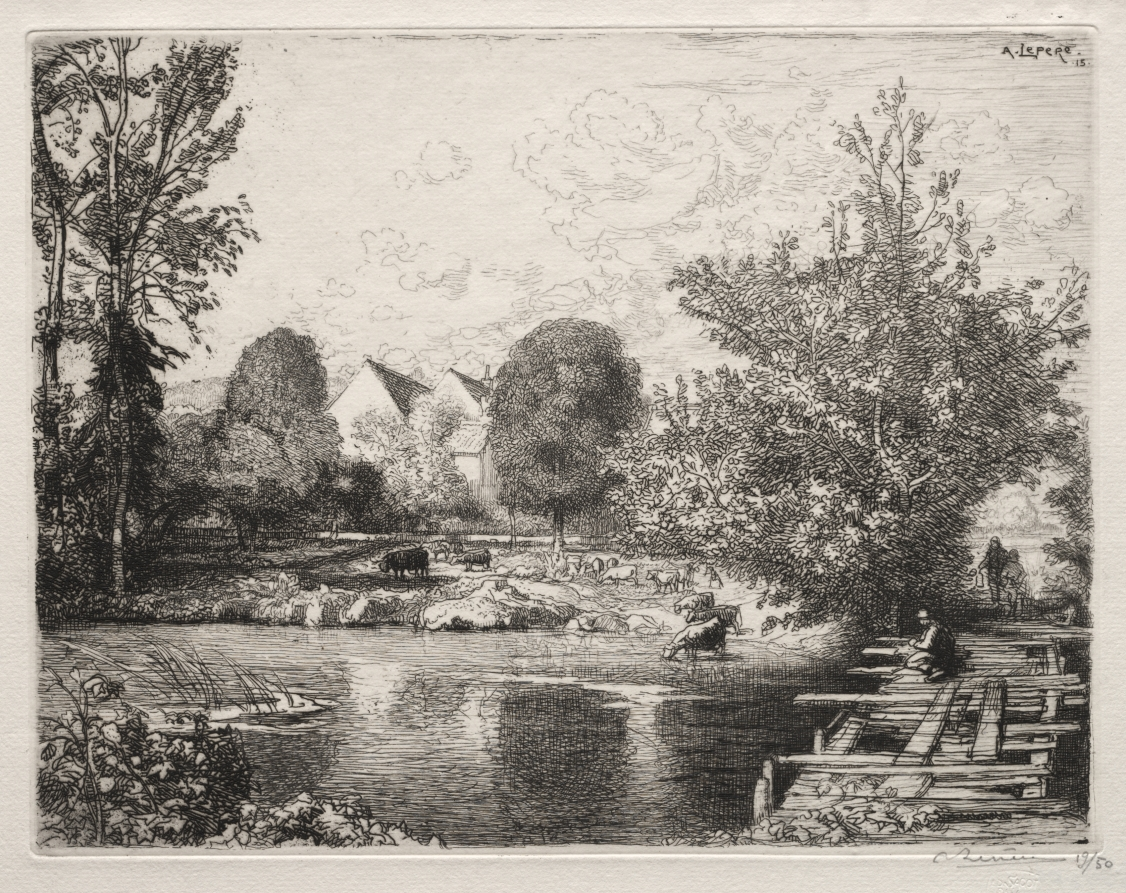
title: The Old Footbridge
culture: France, 20th century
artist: Auguste Louis Lepère (French, 1849–1918)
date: 1915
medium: etching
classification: Print